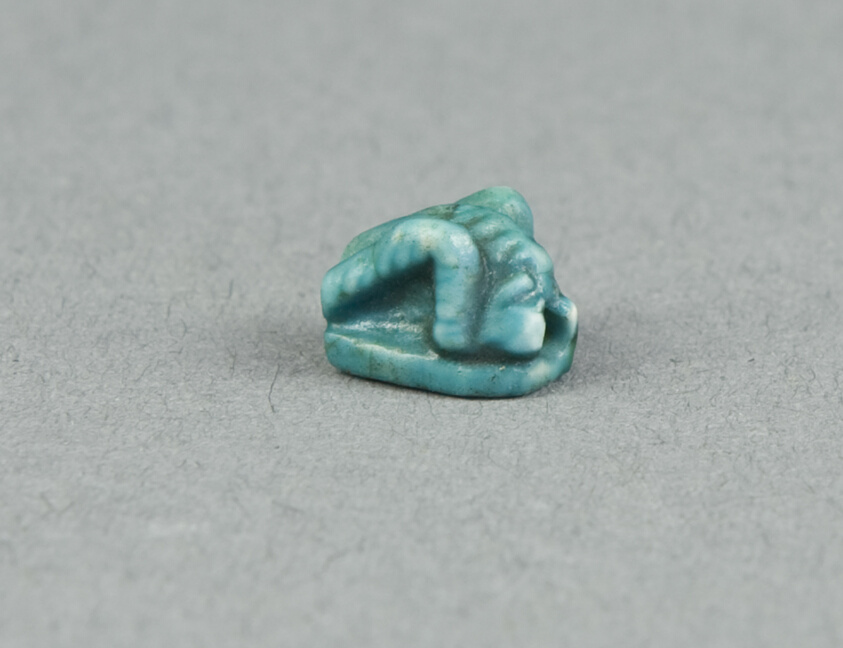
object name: Costume and Accessories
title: Scaraboid: Grasshopper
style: new kingdom, egyptian, ancient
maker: Egyptian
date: New Kingdom, Dynasties 18–20, reign of Thutmose III onwards (about 1479–1069 BCE)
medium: Faience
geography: Egypt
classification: scaraboids; amulet; ancient art; costume; faïence (composite material)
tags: insects, Hieroglyphs